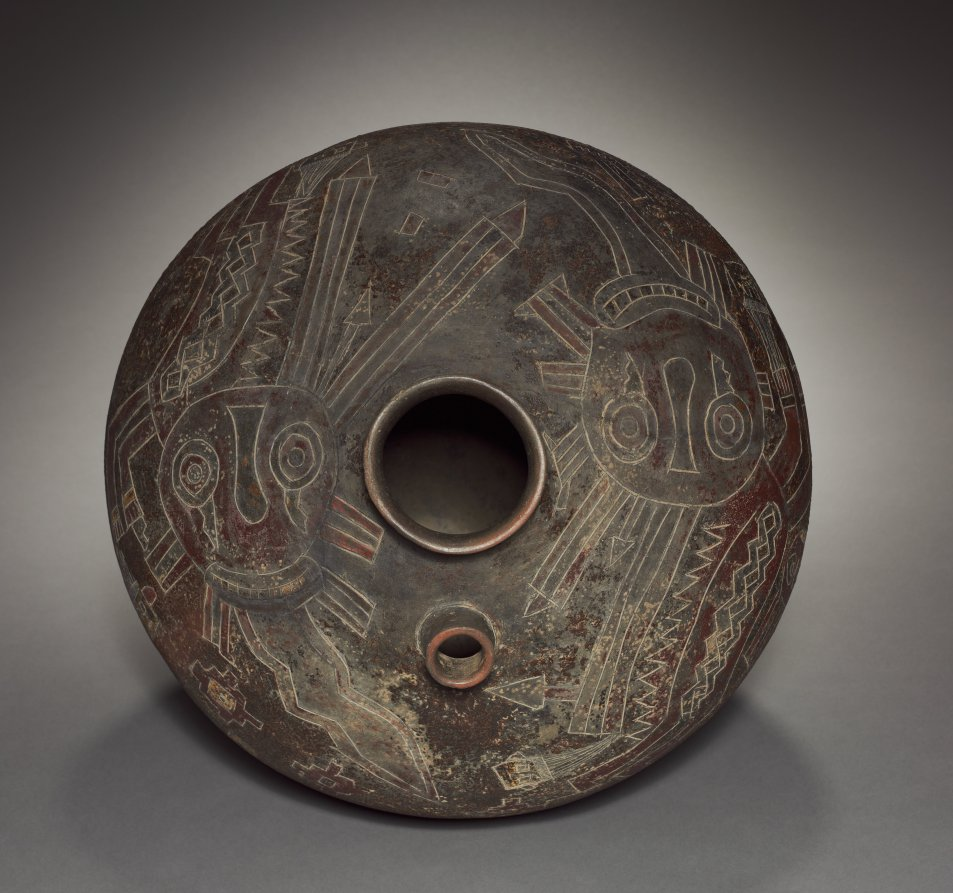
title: Vessel with Oculate Being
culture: Peru, South Coast, Paracas (Cavernas) style (700 BCE–1 CE)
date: 300 BCE–1 CE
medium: earthenware with resin-based paint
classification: Ceramic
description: A supernatural creature known today as the Oculate Being, after its huge eyes, became prominent late in Paracas times. The Paracas left no written records and this creature's meaning is poorly apprehended, but it clutches a severed human head by the hair. A hint of the head's significance comes from the Oculate Being itself, whose head sprouts streamers that may represent abstract energy or force. The severed head cult, then, may have aimed at capturing and redirecting this energy. (Other Paracas objects appear nearby.)